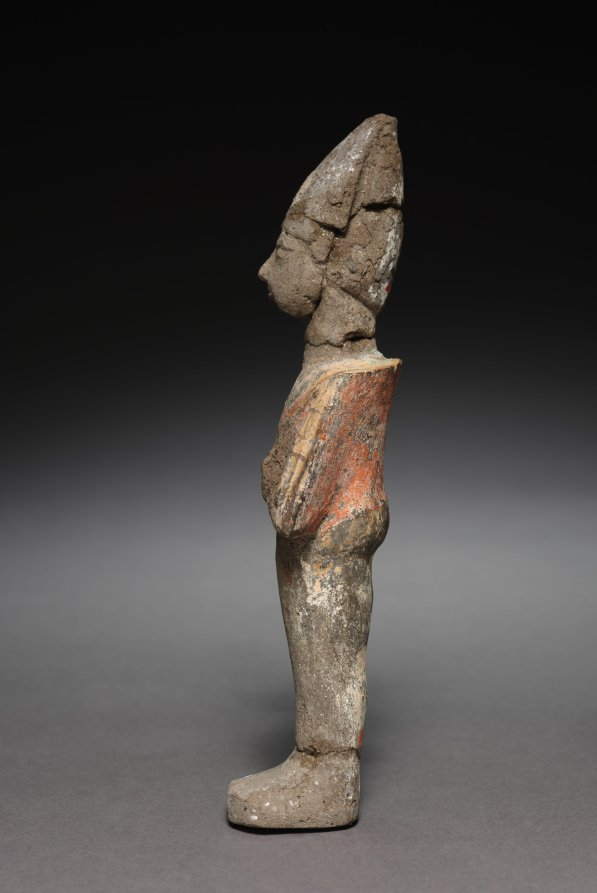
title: Statuette of Osiris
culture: Egypt, New Kingdom (1540–1069 BCE), Dynasties 19–20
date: 1295–1069 BCE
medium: painted terracotta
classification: Funerary Equipment